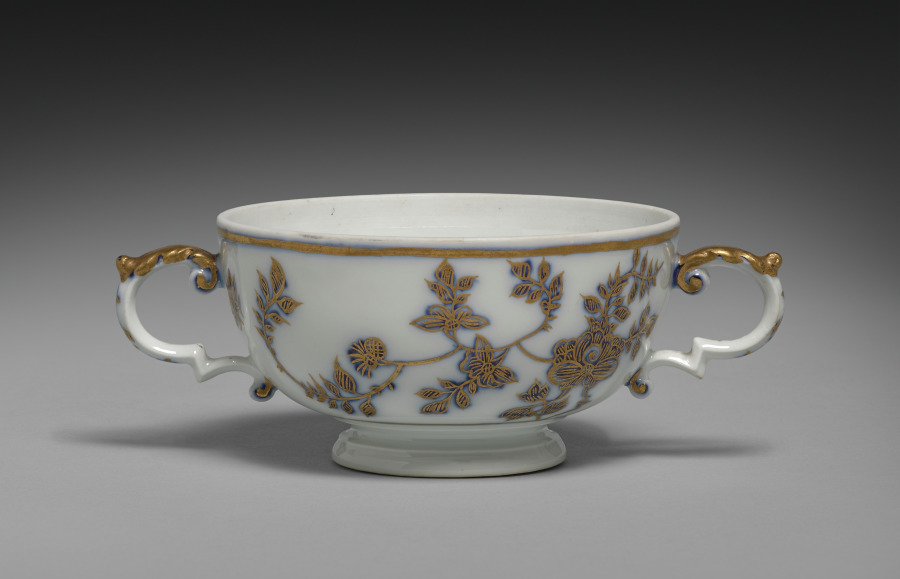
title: Broth Bowl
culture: Germany, Meissen, 18th century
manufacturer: Meissen Porcelain Factory (German, est. c. 1710)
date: 1730–40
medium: gilt porcelain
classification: Ceramic